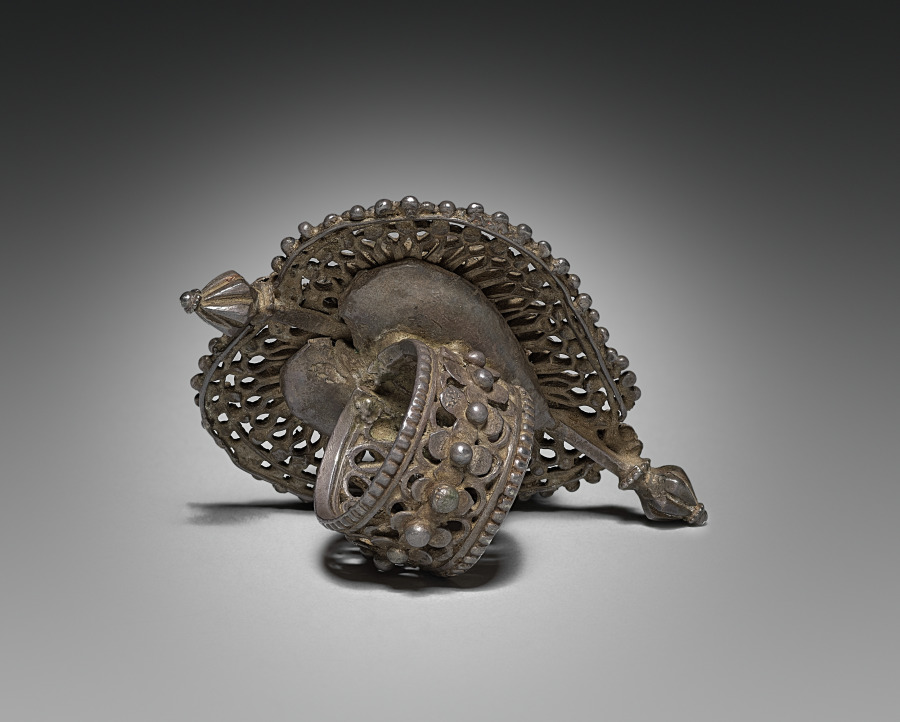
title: Ring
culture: India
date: 1800s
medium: silver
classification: Jewelry